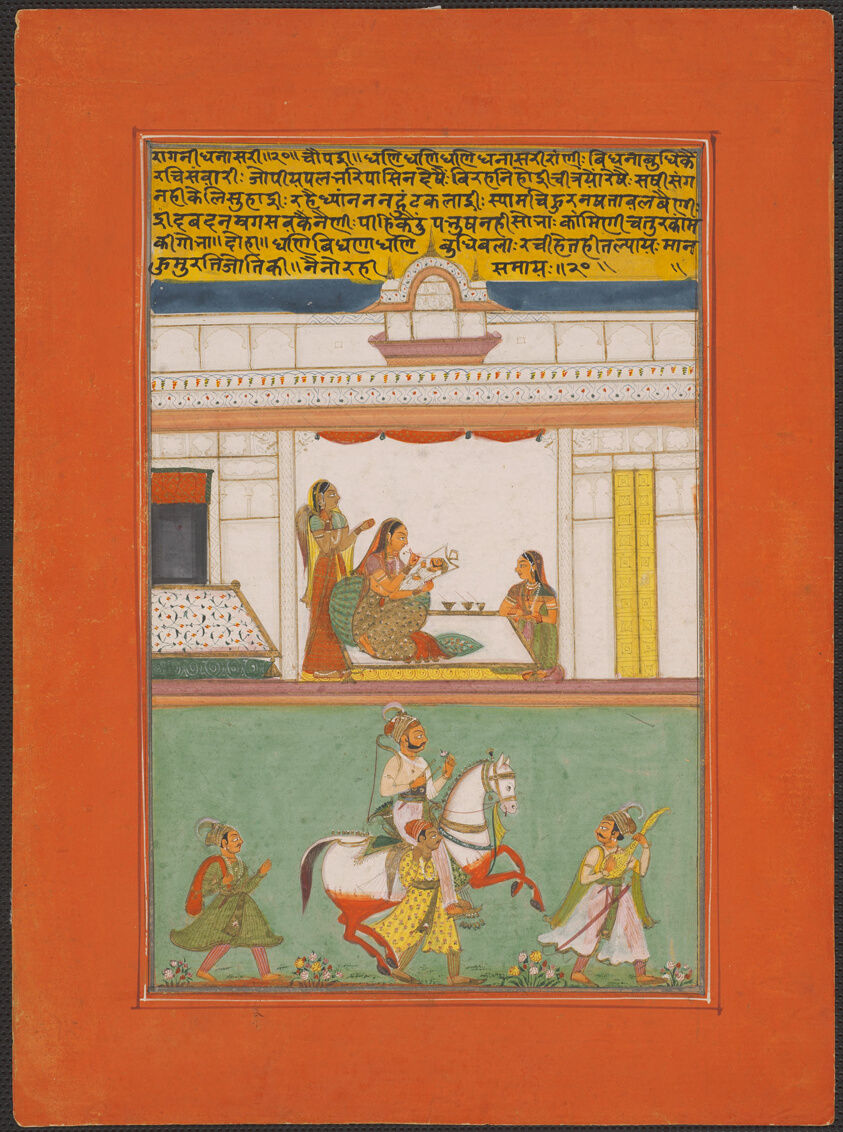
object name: Painting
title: Ragini Dhanashri, Page from a Jaipur Ragamala Set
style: South Asian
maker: India; Rajasthan, Jaipur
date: c. 1750-1770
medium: Opaque watercolor on paper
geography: Rajasthan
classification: miniature painting; painting; asian art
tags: music, musicians